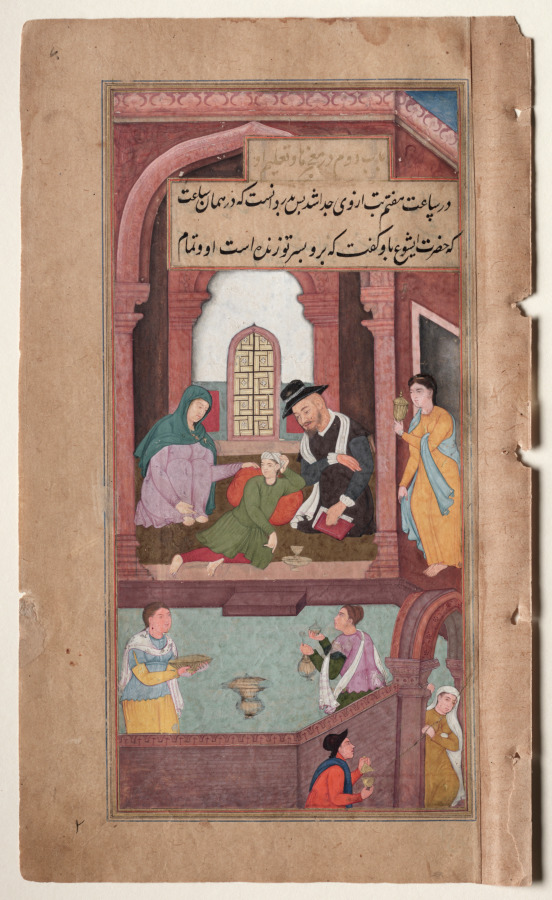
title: Jesus Heals the Nobleman’s Son in Capernaum (folio 70 recto), from a Mirror of Holiness (Mir’at al-quds) of Father Jerome Xavier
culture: Mughal India, Allahabad, made for Prince Salim (1569–1627)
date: 1602–4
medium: Gum tempera, ink, color, and gold on paper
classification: Manuscript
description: The diminutive figure wearing green in the center of the composition is the young son of a nobleman who was dying. Jesus healed him from afar so quickly that the subsidiary figures at the periphery of the scene are still anxious and bringing pots of remedies. This painting is unfinished; the border of the carpet and the geometric tile patterns on the floor of the forecourt have not been painted. An unknown number of artists with different backgrounds, skills, and experience contributed to this project, and even this work appears to be by at least two different hands.